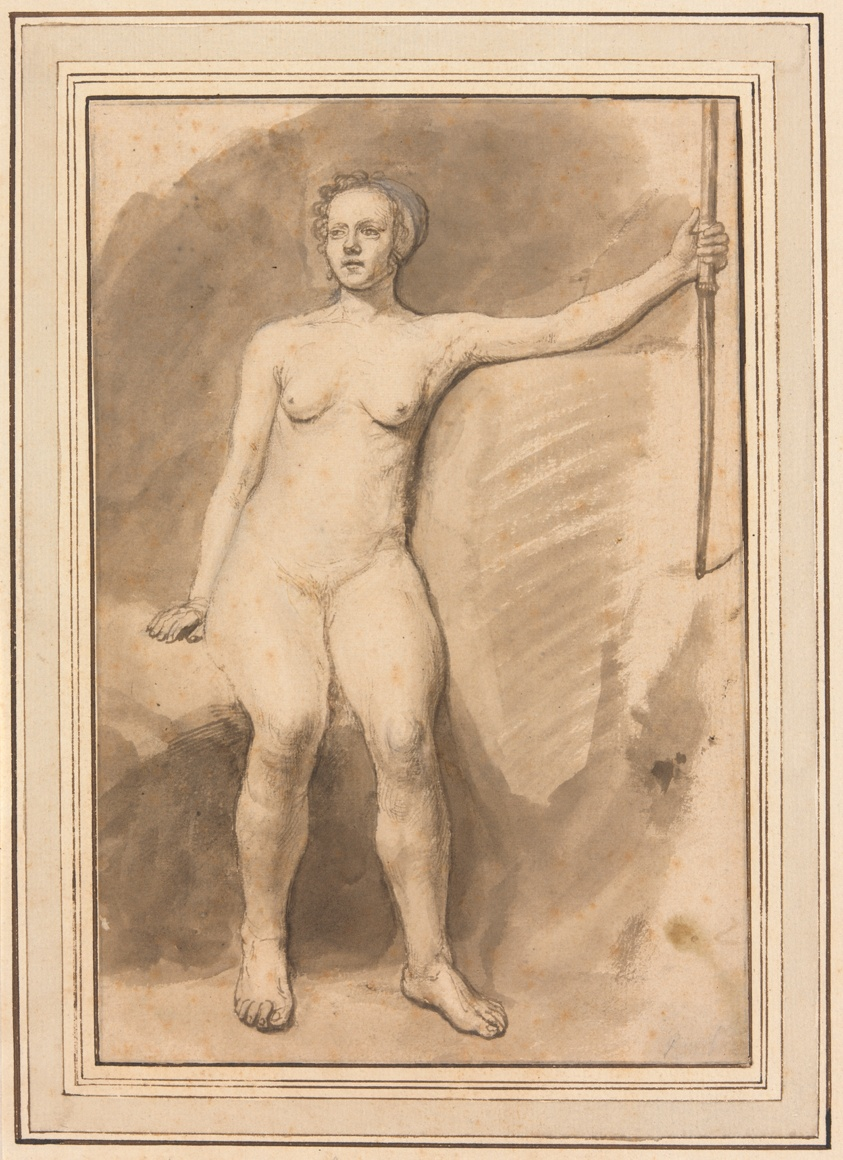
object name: Drawing and Watercolor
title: Seated Female Nude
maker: Samuel van Hoogstraten (Dutch, 1627-1678)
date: 1647/78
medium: Pen and brown ink and brush and brown wash, with traces of black chalk and opaque white watercolor, on cream laid paper, laid down on cream laid paper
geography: Holland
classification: pen and ink drawings; drawings (visual works); prints and drawing